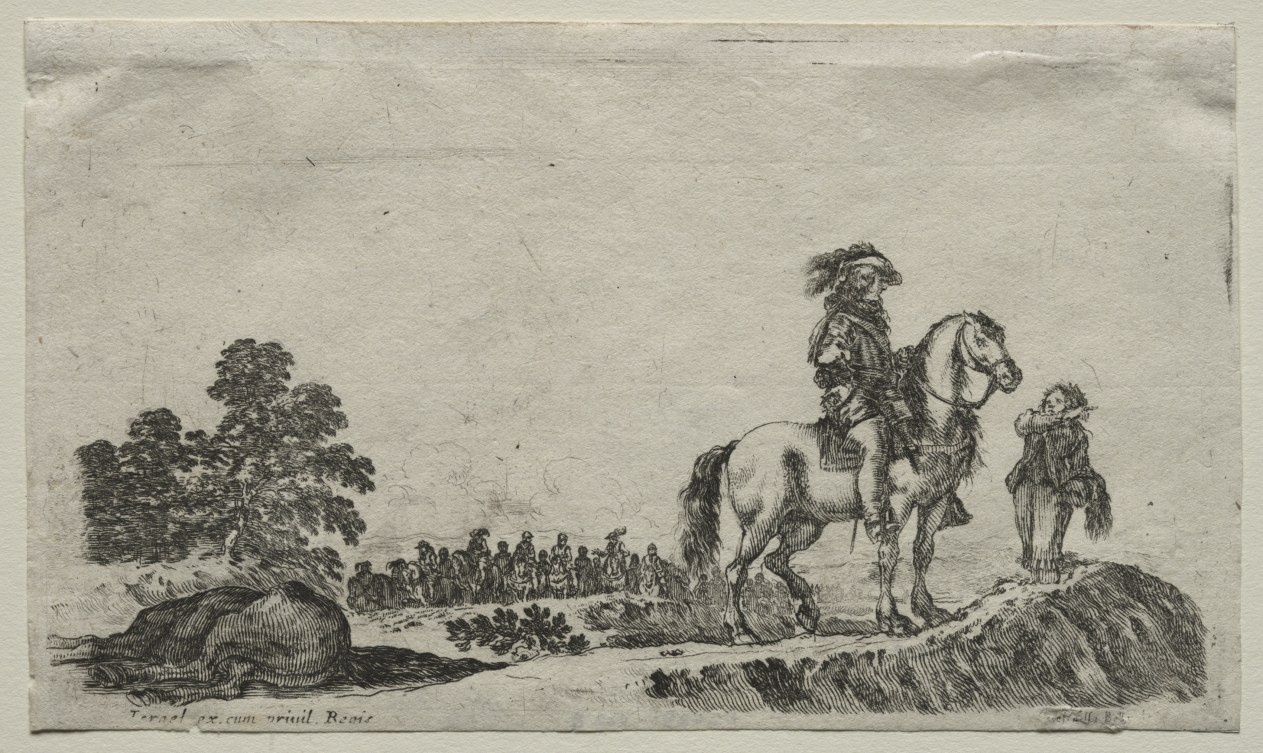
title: Various Figures and Landscapes: A Lost Horseman Enquiring the Way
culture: Italy, 17th century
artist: Stefano Della Bella (Italian, 1610–1664)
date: 1649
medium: etching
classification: Print